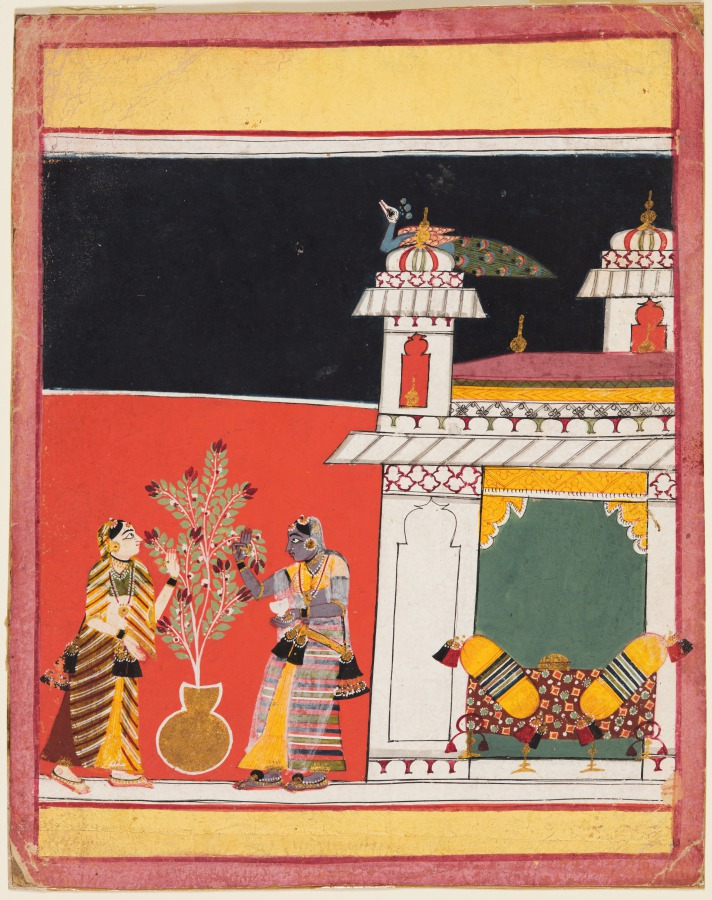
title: Two Women Pluck Flowers on a Terrace: Gunakali Ragini, from a Ragamala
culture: Central India, Madhya Pradesh, Malwa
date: c. 1650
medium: Gum tempera and gold on paper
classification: Painting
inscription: Verso: Gunakari Ragini; Text Stamped, Tasvir Khana, No: 4, Datiya State (Later date), the lower stamp is not visible in the image.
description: A woman with dark complexion and her fair-skinned companion collect flowers in a white bowl from a plant growing in a golden pot. Two huge yellow bolsters set rakishly on the bed suggest restlessness inside the chamber. A gold box for breath-freshening betel (paan) is on the bed, and golden wine vessels are in the two turrets and on the roof, probably to be drunk while watching for her lover to arrive.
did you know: The musical mode Gunakari is performed before sunrise, suggested by the black background.